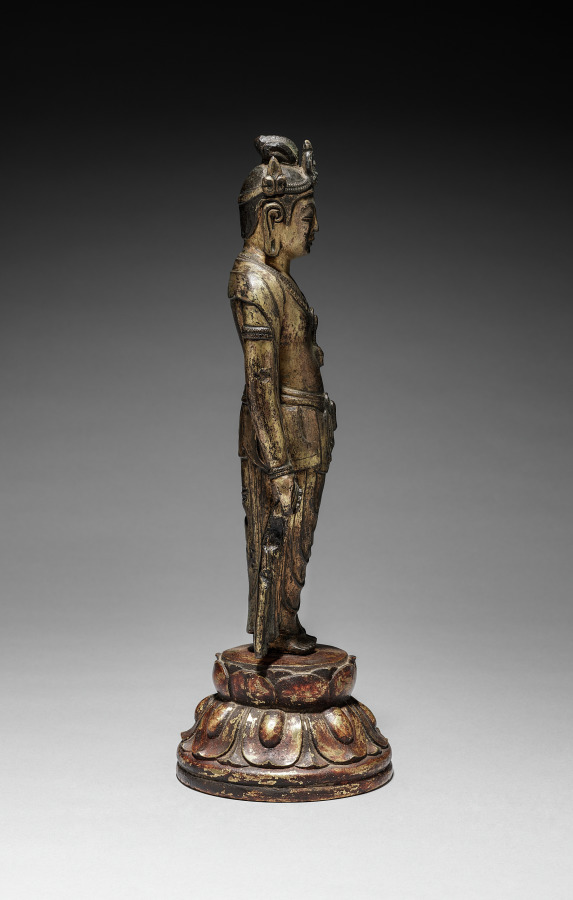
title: Kannon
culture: Japan, Asuka period (538–710)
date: mid-600s–early 700s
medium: gilt bronze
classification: Sculpture